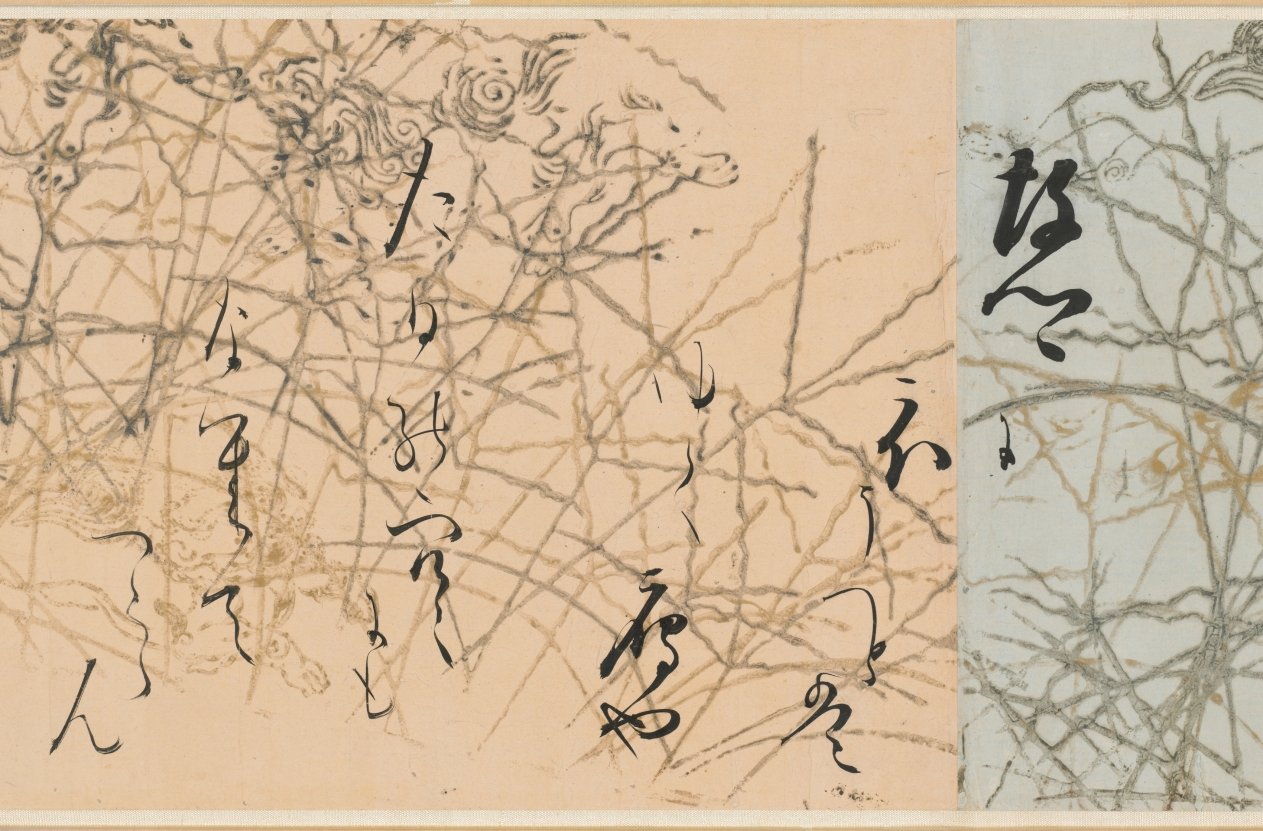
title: Selections from the New Collection of Japanese Poems from Ancient and Modern Times (Shinkokin wakashū) with Printed Designs of Chinese Lions and Crab Finger Grass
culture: Japan, Edo period (1615–1868)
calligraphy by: Hon'ami Kōetsu (Japanese, 1558–1637)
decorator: Tawaraya Sōtatsu (Japanese, c. 1570–c. 1640)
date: early 1600s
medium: handscroll; ink, gold, and silver on paper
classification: Calligraphy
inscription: Seal: 光悦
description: Hon’ami Kōetsu was a calligrapher and craftsman who frequently collaborated with the painter Tawaraya Sōtatsu, considered the first master of the Rinpa school. Kōetsu brushed seven poems from the autumn section of a poetry anthology onto dyed paper with motifs designed and printed in gold and silver by Sōtatsu.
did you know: Before becoming a master painter of screens, Tawaraya Sōtatsu painted fans.